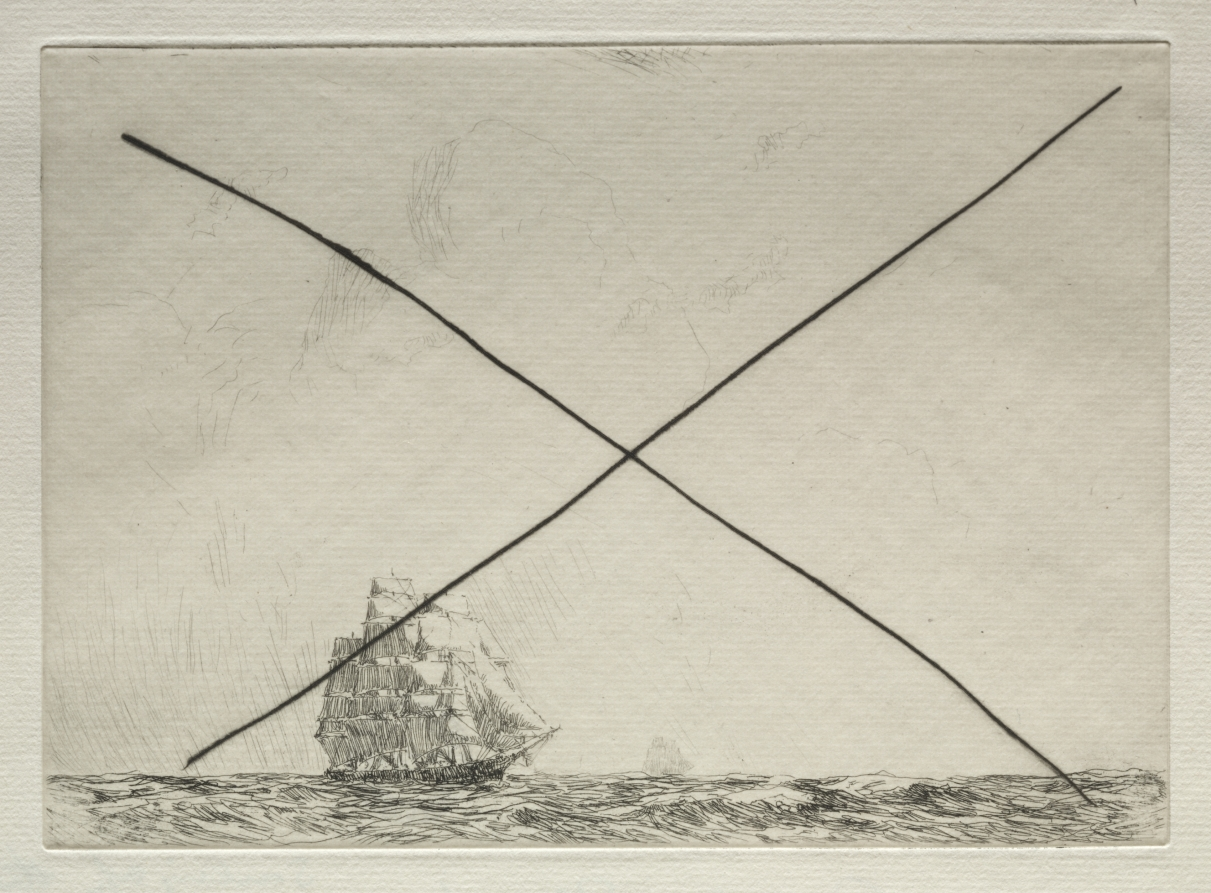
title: Up Channel: Taeping and Ariel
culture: England, 20th century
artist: Arthur John Trevor Briscoe (British, 1873–1943)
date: c. 1900–1937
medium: etching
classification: Print